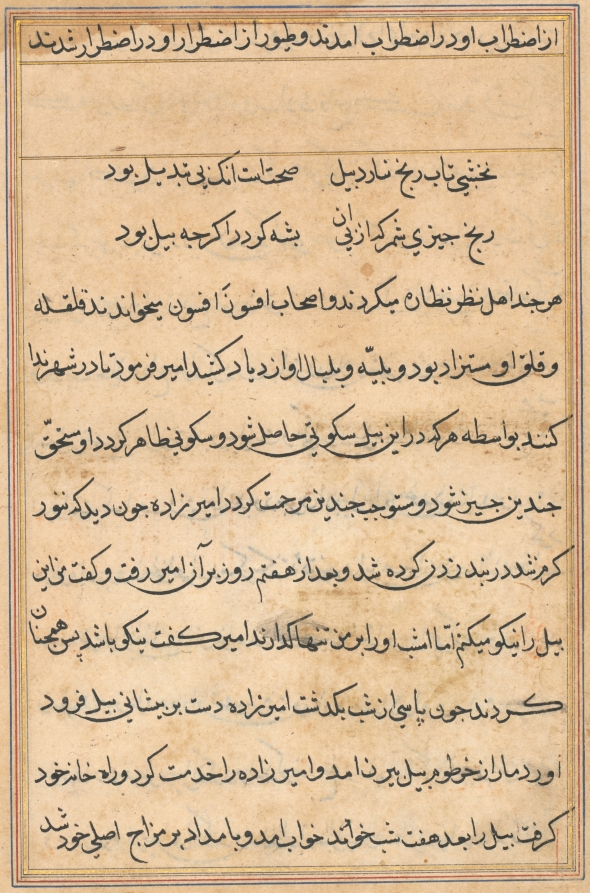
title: Page from Tales of a Parrot (Tuti-nama): text page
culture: Mughal India, court of Akbar (reigned 1556–1605)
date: c. 1560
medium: gum tempera, ink, and gold on paper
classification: Painting